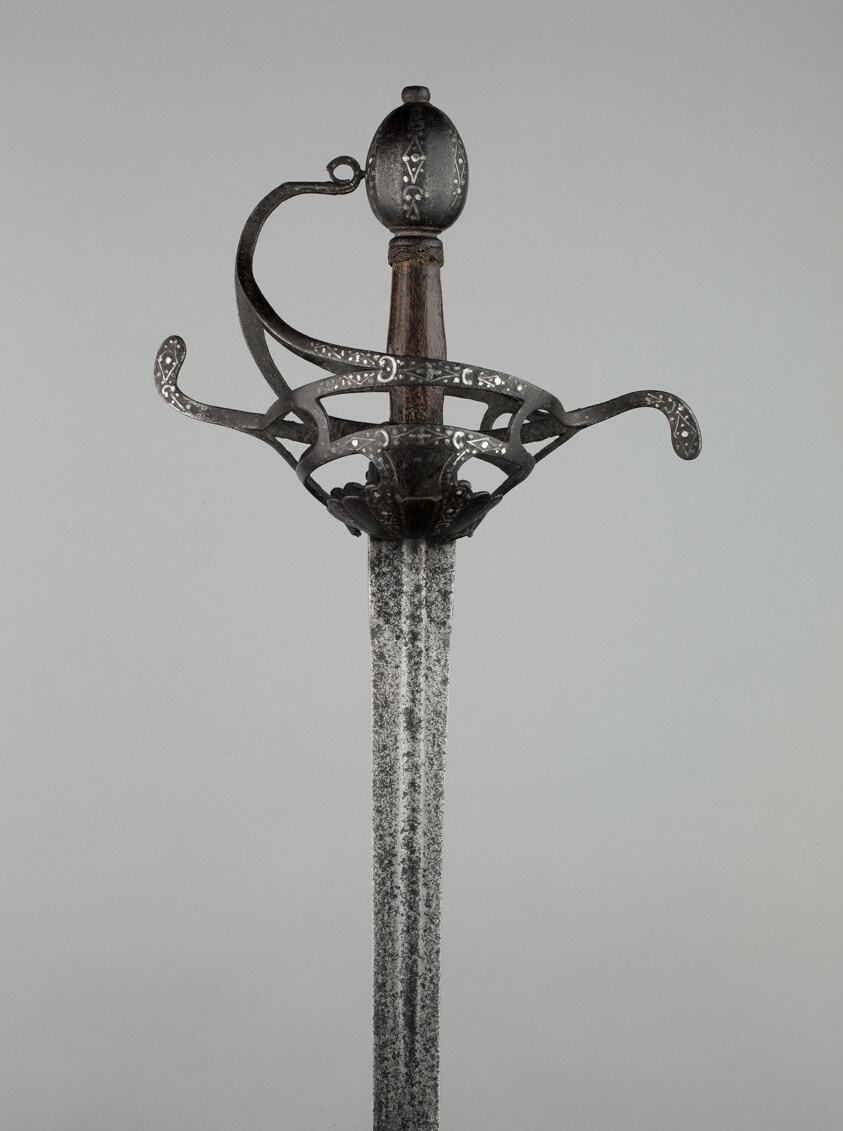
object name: Arms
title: Rapier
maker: English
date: c. 1630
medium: Iron, steel, and silver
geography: England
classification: edged weapon-sword; arms; arms and armor